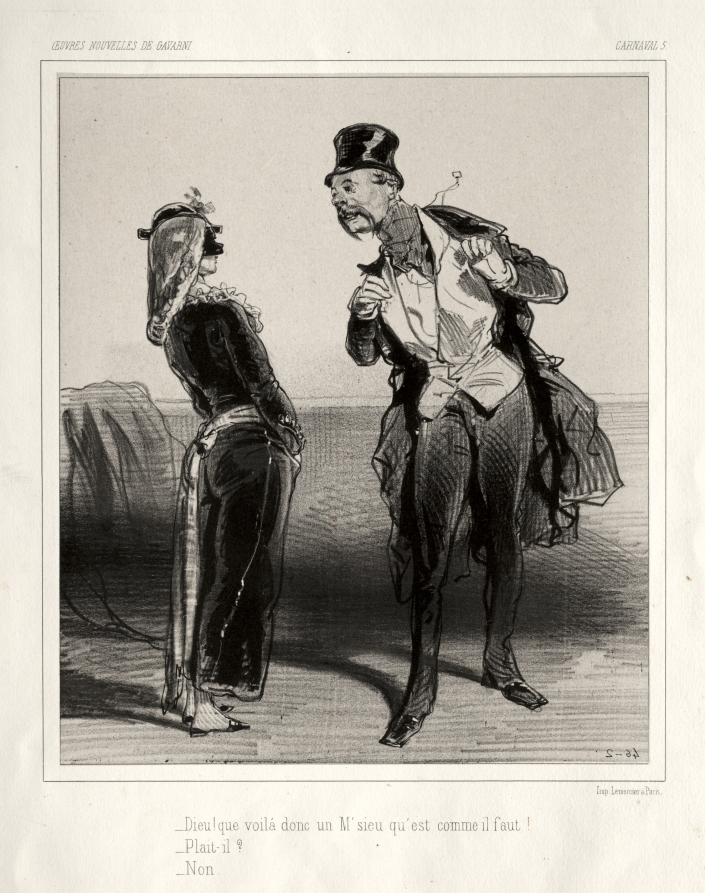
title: Carnaval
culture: France, 19th century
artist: Paul Gavarni (French, 1804–1866)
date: c. 1841–47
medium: lithograph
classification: Print